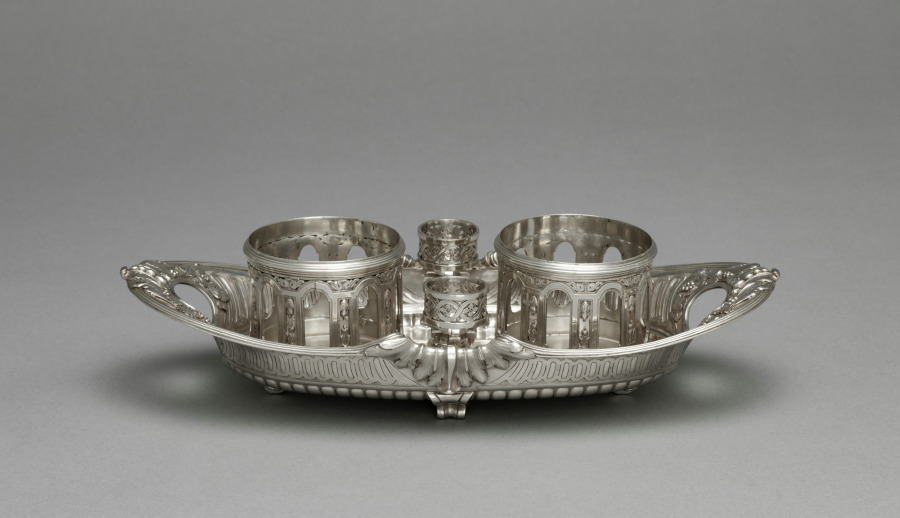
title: Cruet Stand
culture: France, 18th century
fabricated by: Robert Joseph Auguste (French, 1723–after 1795)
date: 1766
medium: silver and glass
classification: Silver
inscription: inscribed on base: R. J. Auguste Paris 1766.